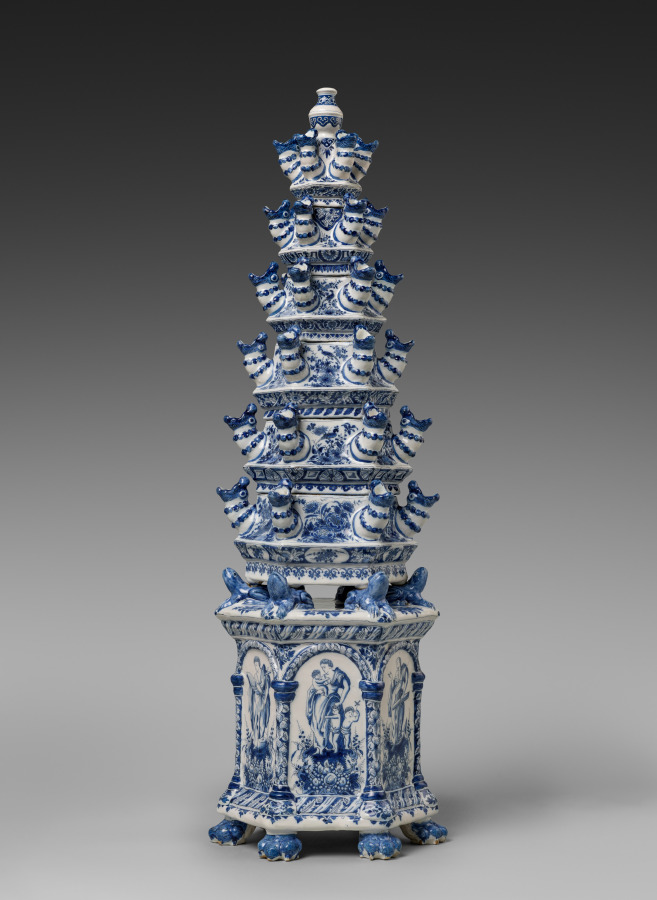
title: Flower Pyramid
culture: Netherlands, Holland, Delft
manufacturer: Adrianus Kocx (Dutch, active 1686–1701)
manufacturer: De Grieksche A (The Greek A) Factory (Netherlands, 1658–1811)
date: c. 1690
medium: Tin-glazed earthenware, painted in blue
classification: Ceramic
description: Allegorical figures representing Faith, Hope, and Love decorate the base of this pyramid, on which rest six tiers with spouts where flowers can be placed. Flower pyramids are among the most complex and luxurious types of ceramics produced in Delft in the late 1600s. This example was made in the Greek A Factory, owned by Adrianus Kocx. During his tenure, the factory became the most prestigious of Delft potteries and received commissions from Queen Mary II, who ruled over England, Scotland, and Ireland together with her husband, William III. She contributed to the international spread of the fashion for Delft ceramics.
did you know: The iconic blue-and-white ceramics from Delft originated as an attempt to copy Chinese porcelain.